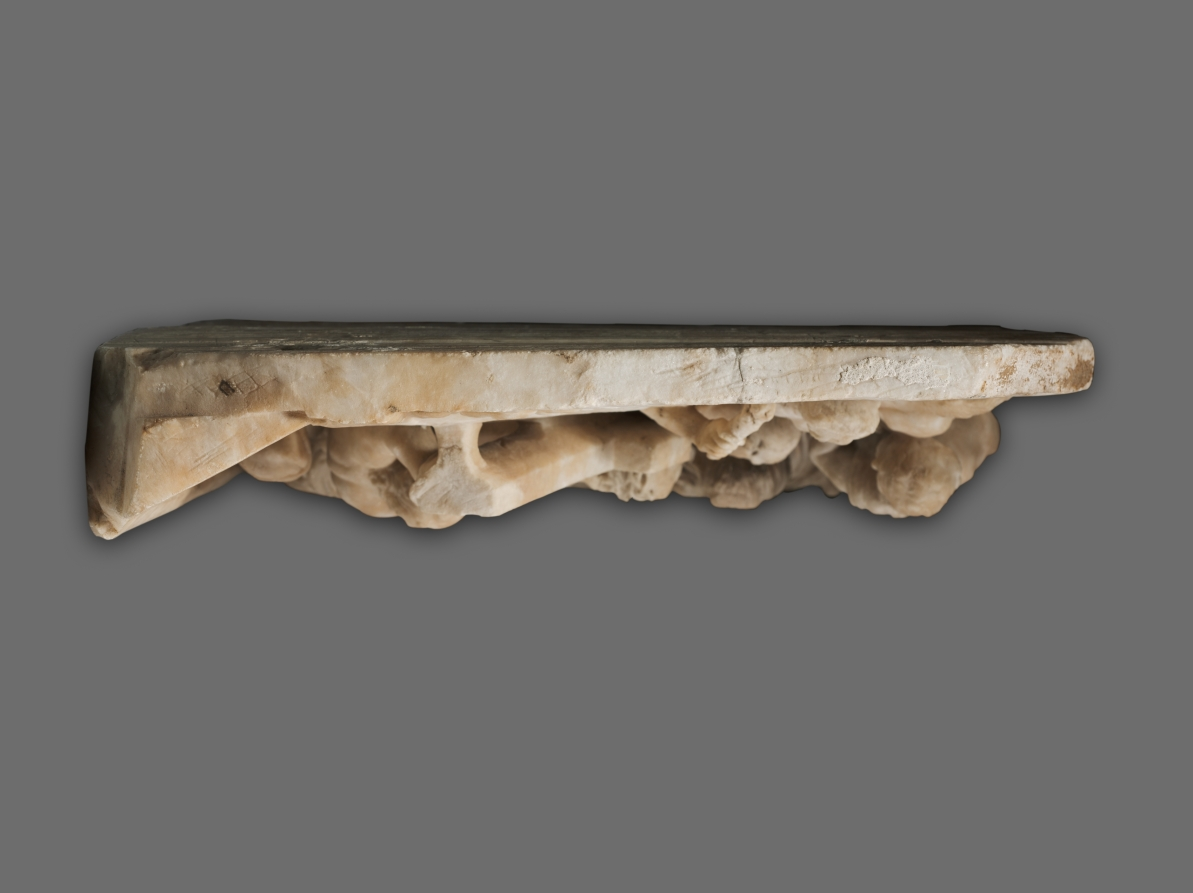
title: Christ Carrying the Cross with Saints Simon and Veronica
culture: South Netherlands, Hainault, 16th century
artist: workshop of Jacques Dubroeucq (Netherlandish, 1500/10–1584)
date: c. 1545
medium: alabaster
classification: Sculpture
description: As Christ dragged his cross through the streets of Jerusalem, Veronica wiped sweat from Christ’s face, which was miraculously imprinted on the fabric. This relief probably came from a choir screen, a barrier between the altar and the congregation, common in medieval churches. Yet the sculpture is more classical than medieval. The artist, yet to be identified, clearly knew the work of Dubreoucq, an artist who brought a taste for Italian Renaissance sculpture to northern France and present-day Belgium. The use of alabaster instead of marble exploits a material local to this part of Europe.